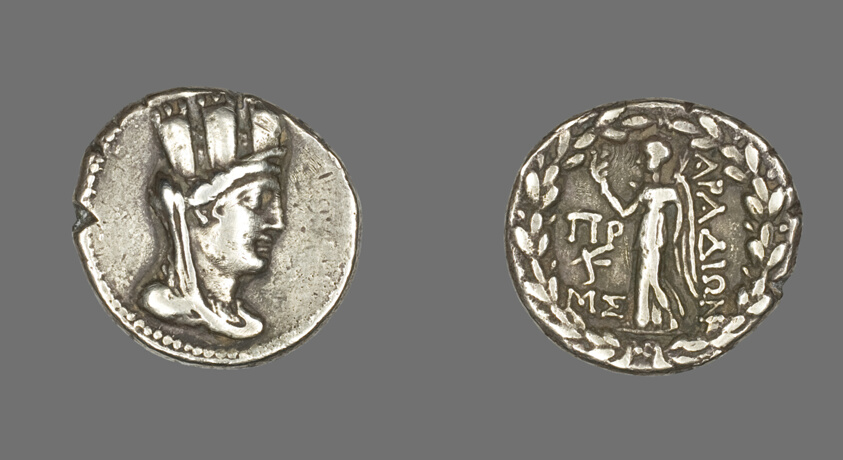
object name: Coin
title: Tetradrachm (Coin) Depicting the Goddess Tyche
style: greek, ancient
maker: Greek; Arados, Phoenicia (now Syria)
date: 80-79 BCE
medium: Silver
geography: Jazirat Arwad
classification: coin; ancient art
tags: goddesses, gods (deities)